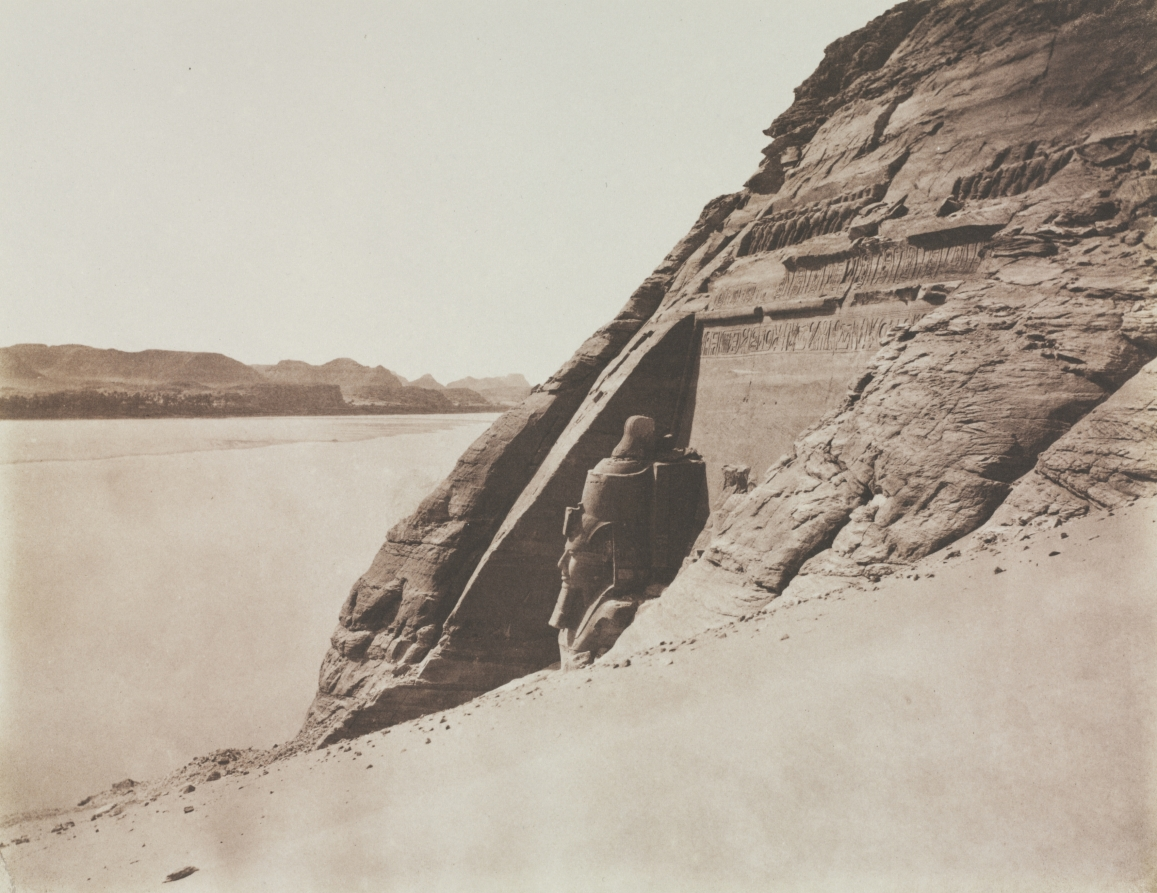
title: Large Speos - View taken from the Sand Slope (Temple of Ramesses II), Abu Simbel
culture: France, 19th century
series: Égypte et Nubie, sites et monuments les plus intéressants pour l'étude de l'art et de l'histoire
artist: Félix Teynard (French, 1817–1892)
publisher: Goupil et Cie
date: 1851–52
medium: salted paper print from calotype negative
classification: Photograph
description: While other images of Abu Simbel by Teynard, Maxime Du Camp, and Antonio Beato emphasize the massive scale of the two temples carved into the rocks, this view by Teynard sets the colossal sculptures into the context of the large cliffs and vast expanses of desert. Like the temple at Philae,the temple complex at Abu Simbel was relocated in 1968 to prevent its submersion beneath the lake formed by the Aswan High Dam. This view no longer exists.